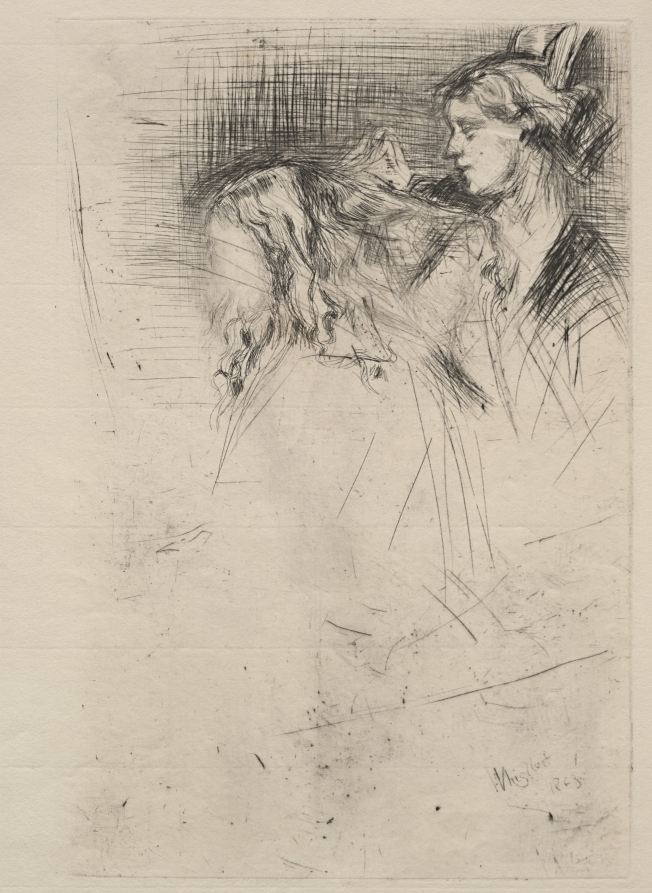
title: The Toilet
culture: America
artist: James McNeill Whistler (American, 1834–1903)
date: 1863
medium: drypoint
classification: Print